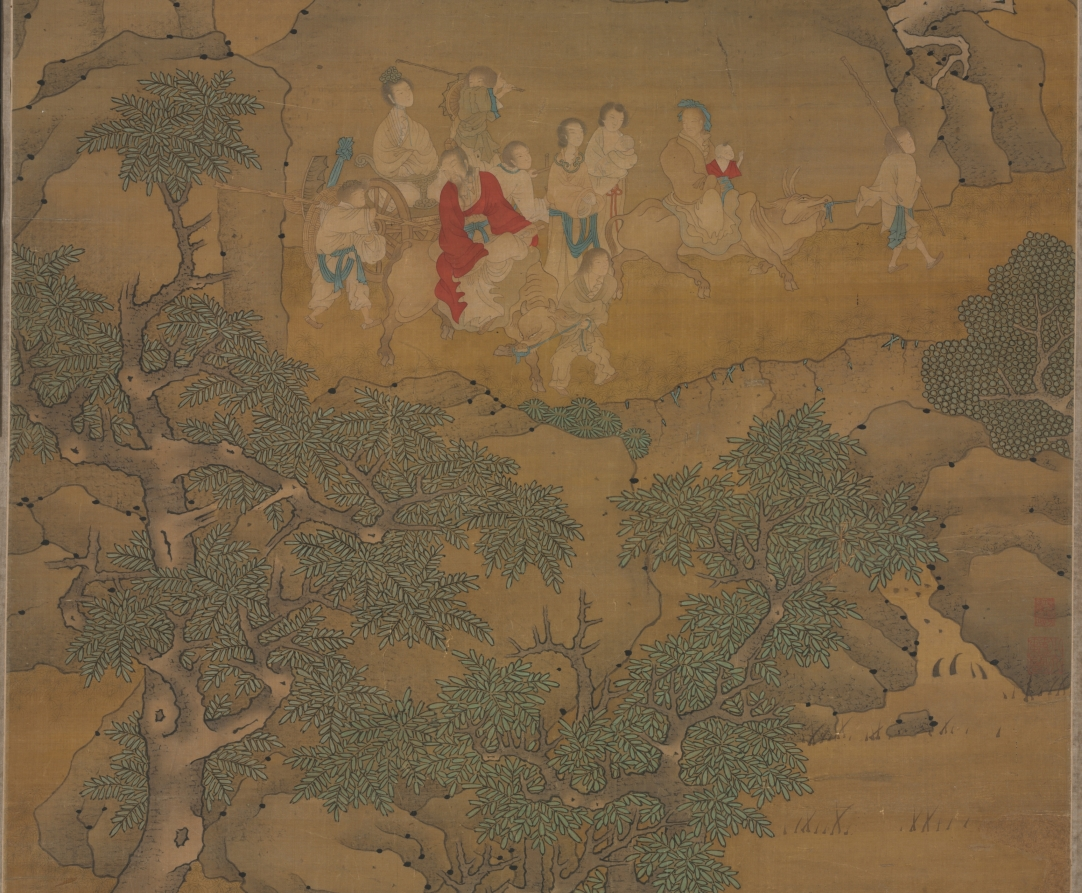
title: Xu Jingyang Moving His Family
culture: China, Ming dynasty (1368–1644)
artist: Cui Zizhong (Chinese, 1574–1644)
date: 1644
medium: Hanging scroll; ink and color on silk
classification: Painting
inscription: Artist's 2 seals: Pei-hai, Cui Zizhong yin.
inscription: 9 additional seals: 2 of Xiang Yuan (18th-19th c.); 1 of Tang Zuomei (late 18th-19th c.); 1 of Zhang Heng 張珩 (1915-1963); 1 of C. C. Wang 王季遷 (1907–2003); 4 unidentified.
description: Xu Jingyang was a dedicated fourth-century Confucian official who allegedly turned into a Daoist immortal. This scroll depicts the legend that when he attained immortality, he took his entire household, including chickens and dogs, to paradise. Cui Zizhong’s painting style intentionally referenced ancient masters. Typical of the pre-Song dynasty landscape tradition, there is the use of blue and green colors and an emphasis on outline rather than texture. While the trembling outlines are reminiscent of earlier painters, the flickering light on rocks and trees is a stylistic feature of Cui’s own time.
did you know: Xu Jingyang, wearing red, is in the upper register of figures, while below his servants transport a rooster, dog, and other supplies.